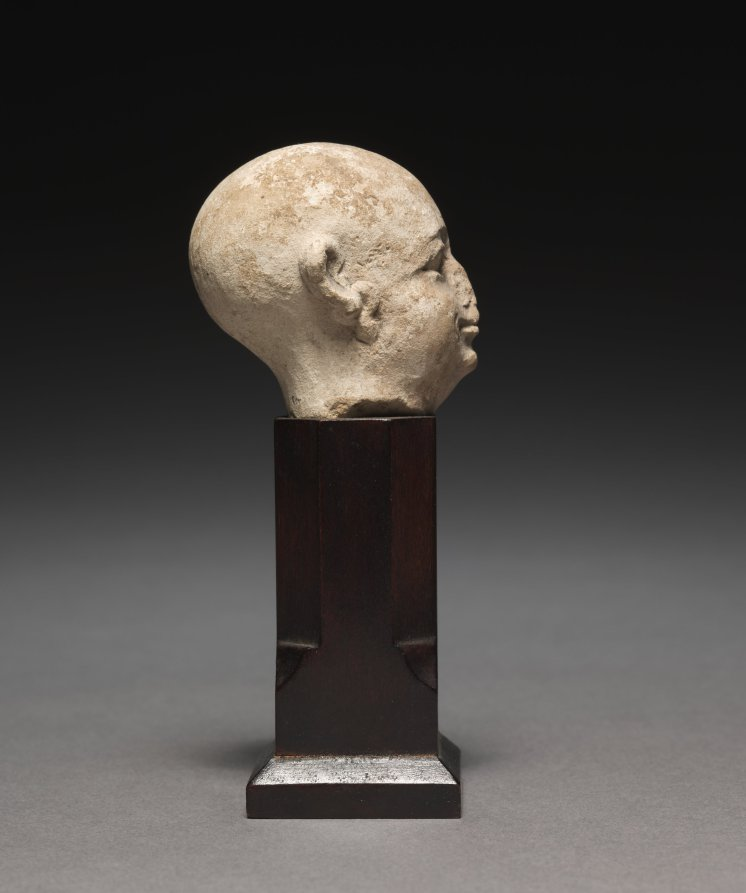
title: Small Head of a Man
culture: Egypt, Greco-Roman period (332 BCE–395 CE), Ptolemaic dynasty (305–30 BCE)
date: 305–30 BCE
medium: limestone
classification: Sculpture